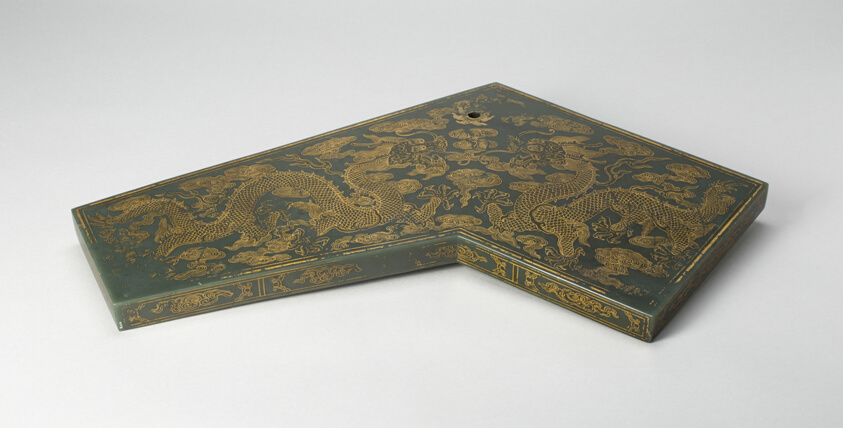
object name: Religious/Ritual Object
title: Musical Chime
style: Chinese (culture or style)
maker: China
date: Qing dynasty (1644–1911), 18th century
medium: Jade with gilt decoration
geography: China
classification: jade; asian art; ritual objects